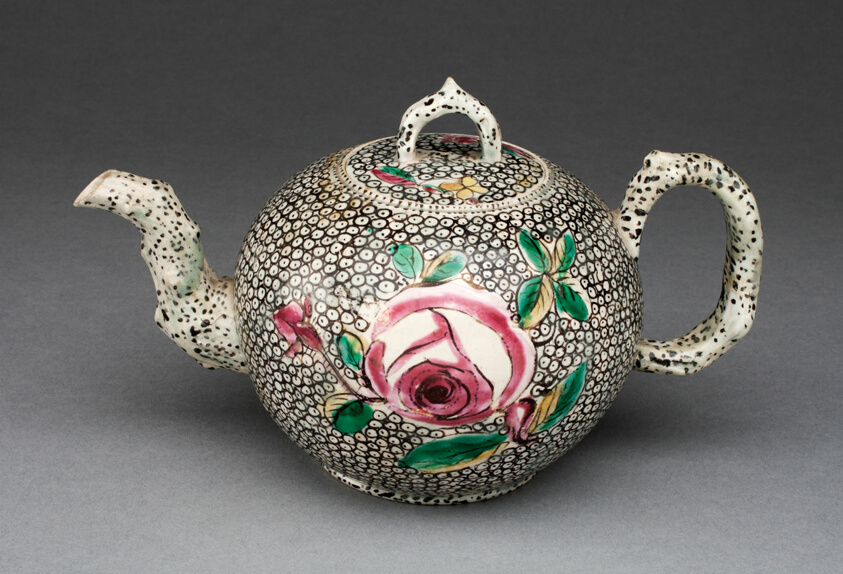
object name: Ceramics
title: Teapot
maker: Staffordshire, England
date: 1755/65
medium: Salt-glazed stoneware, polychrome enamels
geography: Staffordshire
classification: teapot; salt-glazed stoneware; european decorative arts; pottery; stoneware; ceramics